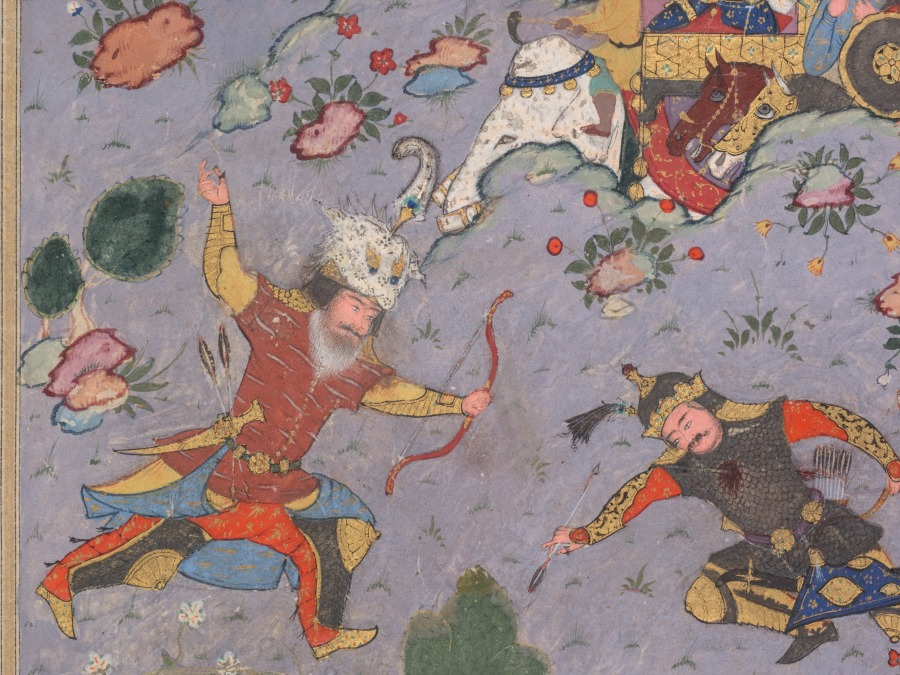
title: Rustam meets the challenge of Ashkabus, from a Shah-nama (Book of Kings) of Firdausi (Persian, about 934–1020)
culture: Iran, Shiraz, Safavid period (1501-1722)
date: c. 1590–1600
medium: opaque watercolor and gold on paper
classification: Manuscript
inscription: Script: none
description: Iran was losing a battle against Turan and the armies of its assembled allies from India and China. The hero Rustam arrived to pull the Iranian army back from the brink of destruction, slaying the enemy warrior Ashkabus on foot while allowing his horse Rakhsh to rest after a long, hard journey. The vast number of armies involved in the battle is indicated by the many banners that extend beyond the illustration’s top border. This painting was probably produced at Shiraz, one of Iran’s major cultural centers, far to the south of the Safavid capital of Tabriz. Artists and works of art moved back and forth steadily between Shiraz and the Deccan in southwestern India during the 1500s and 1600s. The section of the Shah-nama on the recto is famous for the clever conversational repartee between Rustam and his opponent Ashkabus. When Ashkabus remarked that in choosing not to ride a horse Rustam had signed his own death warrant, Rustam retorted, “Would it be the case then that in your country . . . lions, tigers, and crocodiles [all] ride on horses to battle?” Rustam then brought down the horse of Ashkabus with a single arrow; his next arrow pierced Ashkabus in the chest.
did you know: The enemy ruler of China sits in a howdah on the back of a white elephant.